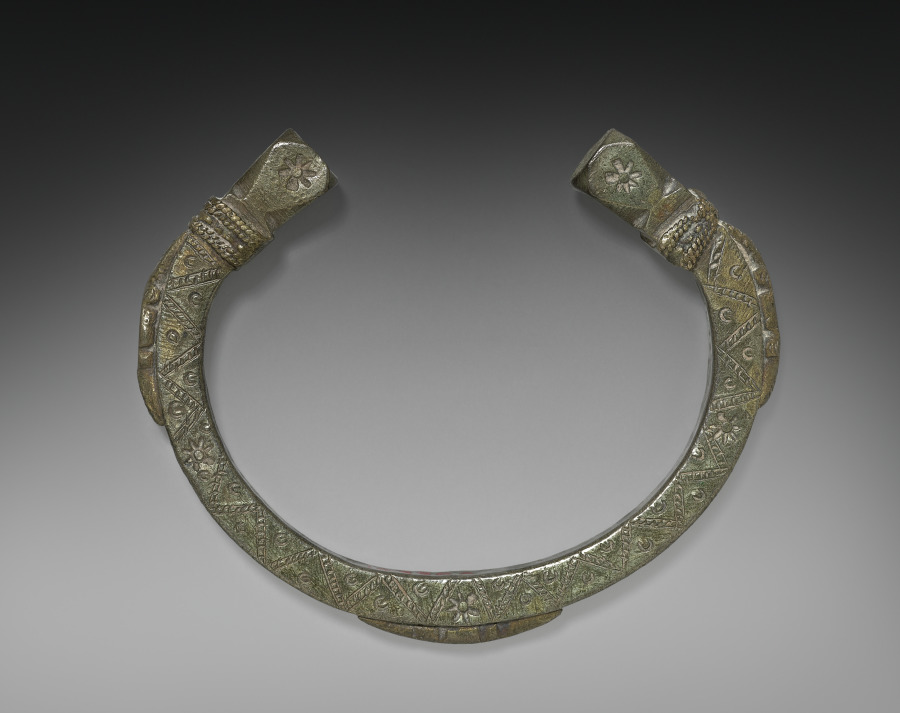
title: Anklet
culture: India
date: 1800s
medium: silver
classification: Jewelry